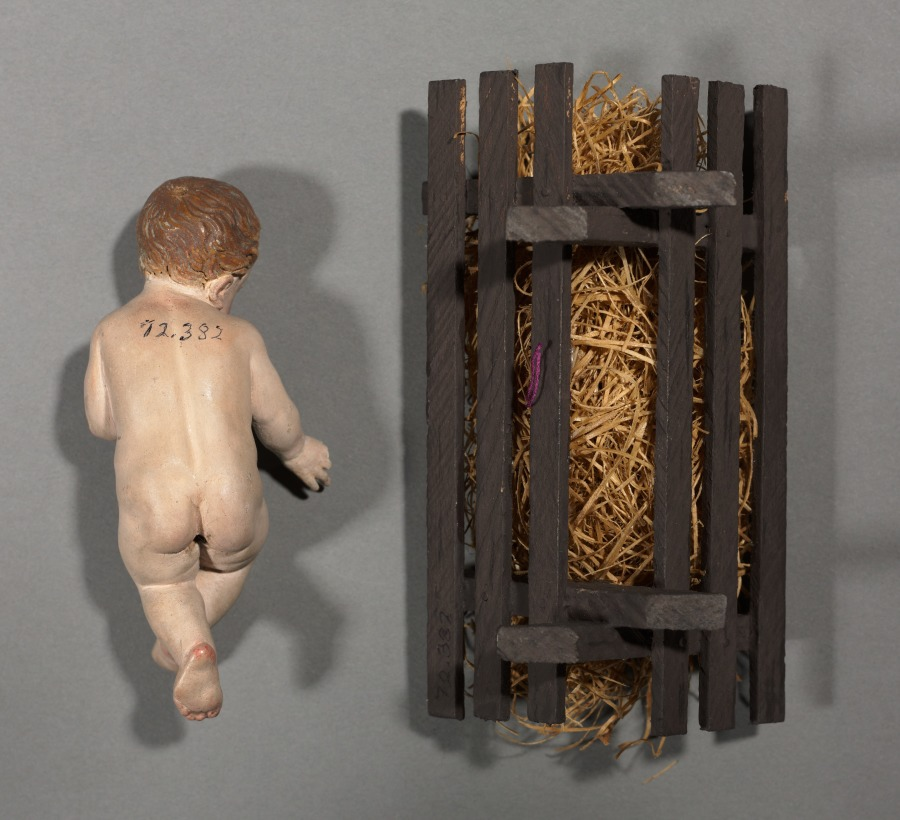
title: Figure from a Crèche: Infant Christ with Crib and Straw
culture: Italy, Naples, late 18th-early 19th century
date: 1780–1830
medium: painted terracotta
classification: Sculpture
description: The practice of creating scenes of the Nativity for the home dates from the early 1700s in Italy, where people began to set up doll-like figures of about a foot or less in height. The custom was particularly popular in Naples around 1800, where crèche scenes (crèche means cradle, or crib) included many figures, whose heads and hands of painted terracotta, stuffed cloth bodies, and clothing adapted from contemporary local costumes gave them an amazingly realistic character. Representations of the birth of Jesus can be traced to the first few centuries of Christianity. Both living creatures and sculptural depictions of them were used from early times. By the late middle ages it was customary to create life-size figures of wood or stone, naturalistically painted, to represent the characters who participated in the events of Jesus's early life. These sculptures were then arranged in scenes illustrating one or both of the most important of these events, the Adoration of the Shepherds and the Adoration of the Magi-the three kings from the East who came to pay homage to the Christ child. Used in churches, these large figures were especially popular in Italy, Central Europe, Spain, and Portugal. This Object in Focus presentation was organized by Henry Hawley, Curator of Renaissance and Later Decorative Arts and Sculpture.